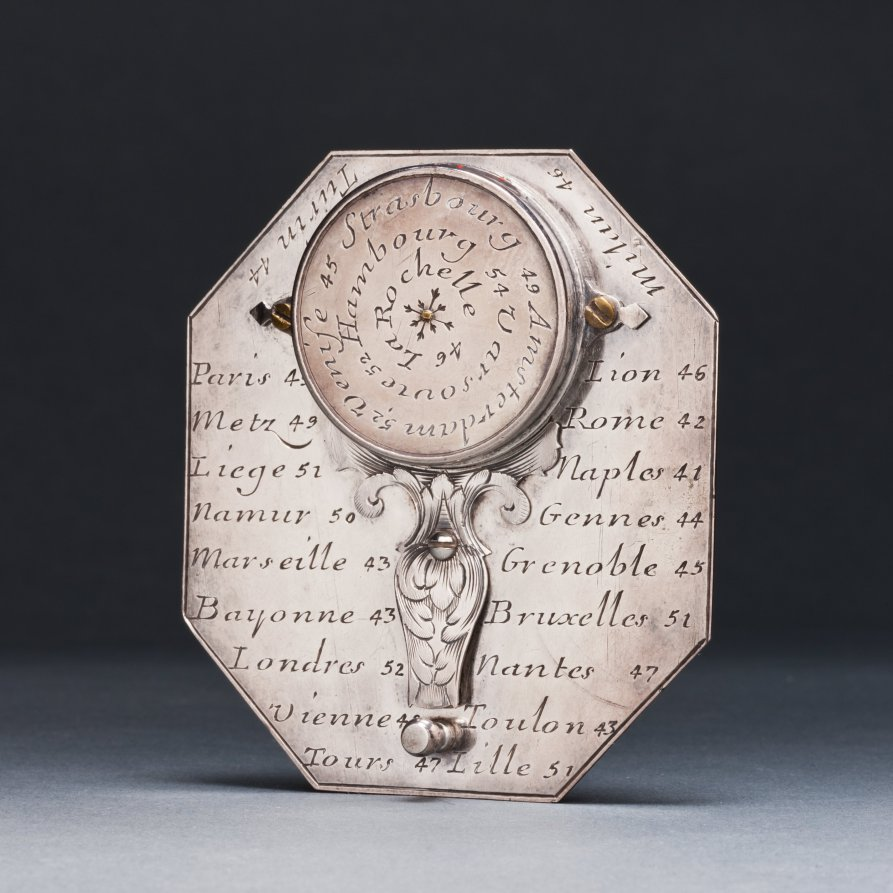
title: Butterfield Sundial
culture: France, 18th century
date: 1700s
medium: silver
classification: Silver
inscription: [Engraved signature above the compass in ribbon band]: "N. BION A Paris"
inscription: [Engraved on the face of the sundial]: “Pour 55° 4-5-6-7-8-9-10-11 50° IIII-V-VI-VII-VIII-IX-X-XI 45° 5-6-7-8-9-10-11 40° -VI-VII-VIII-IX-X-XI'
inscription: [Engraved on the other side]: "Pour 55° -8-7-6-5-4-3-2-1-0 50°-VIII-VII-VI-V-IIII-III-II-I 45°-8-7-6-5-4-3-2-1 40°-VII-VI-V-IIII-III-II-I"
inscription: [Engraved around the compass]: “NORD-OUEST-SUD-EST”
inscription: [Engraved on the back of the sundial]: “Turin 44 Milan 46 Paris 49 Lion 46 Metz 49 Rome 42 Liege 51 Naples 44 Namur 50 Gennes 44 Marseille 43 Grenoble 45 Bayonne 43 Bruxelle 51 Londres 52 Nantes 47 Vienne 48 Toulon 43 Tours 47 Lille 51”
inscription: [Engraved around the back of the compass]: “Venise 45 Strasbourg 49 Amsterdam 52 Hambourg 54 Varsovie 52 La Rochelle 46”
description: Butterfield-type sundials are characterized by their adjustable gnomons, metal flaps that cast a shadow on the dial’s face to indicate the hour, and geographical indices. This sundial has a scale adjustable between latitudes of 40° to 60° north. The latitudes of 26 European towns are engraved on its back for quick reference. With an intricately engraved silver face, it would have functioned as a fashionable traveler’s accessory.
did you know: Butterfield-style sundials were named after Micheal Butterfield, an English scientific and mathematical instrument maker who worked in Paris between 1674 and 1724.